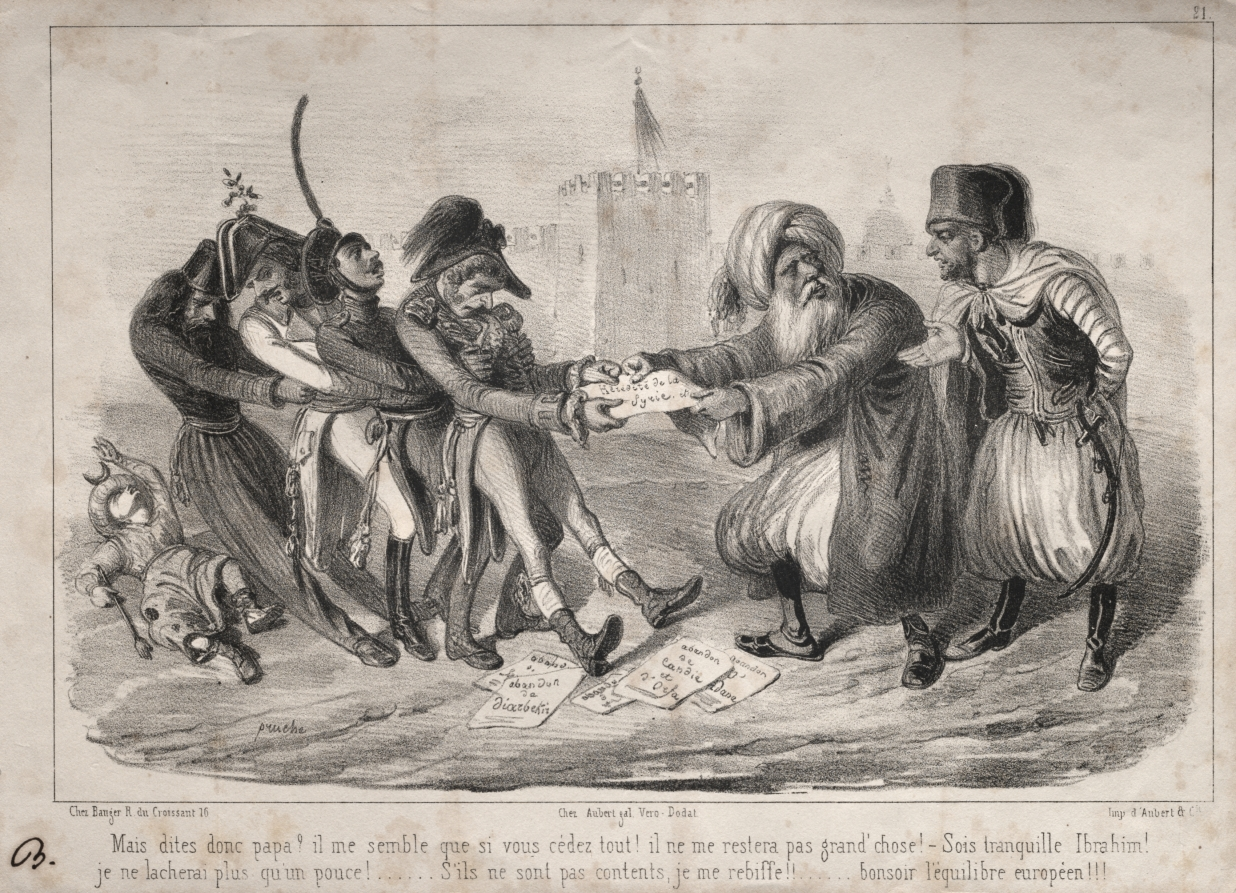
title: Actualités: Mais dites donc papa?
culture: France, 19th century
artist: Clémente Pruche (French, 1831–1870)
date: c. 1839–41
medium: lithograph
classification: Print